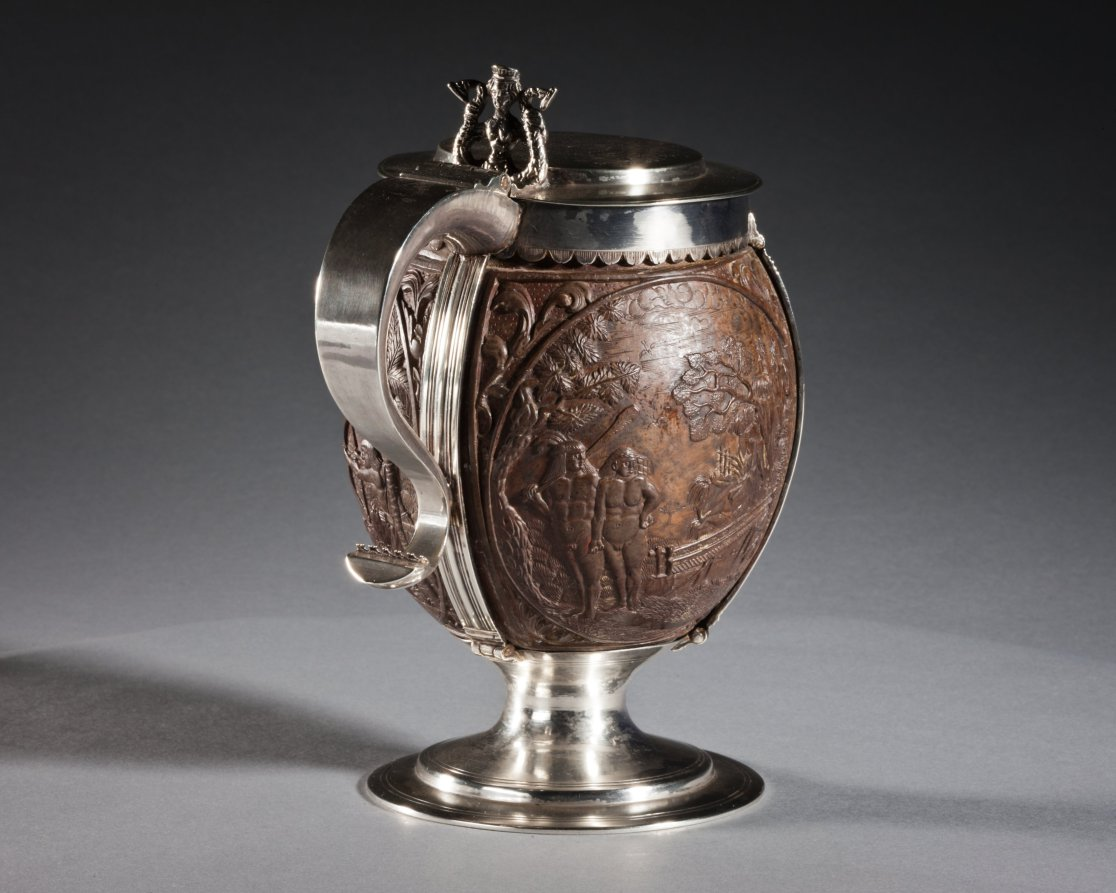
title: Coconut Cup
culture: carved coconut, probably The Netherlands; silver mount, probably England, 17th century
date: c. 1630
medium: carved coconut in silver mount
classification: Metalwork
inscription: top lid has engraved coat-of-arms, underside of lid has inscription: George Lewis TIVERTON Feby, 1st 1760.